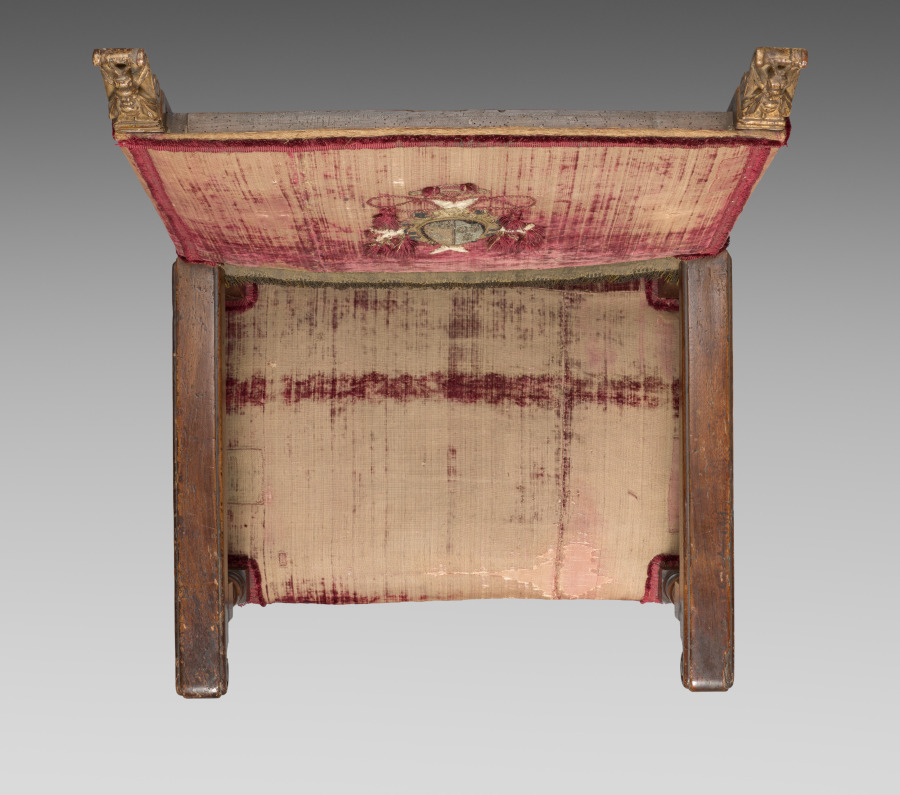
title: Armchair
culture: Italy, 17th century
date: 1600s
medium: walnut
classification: Furniture and woodwork